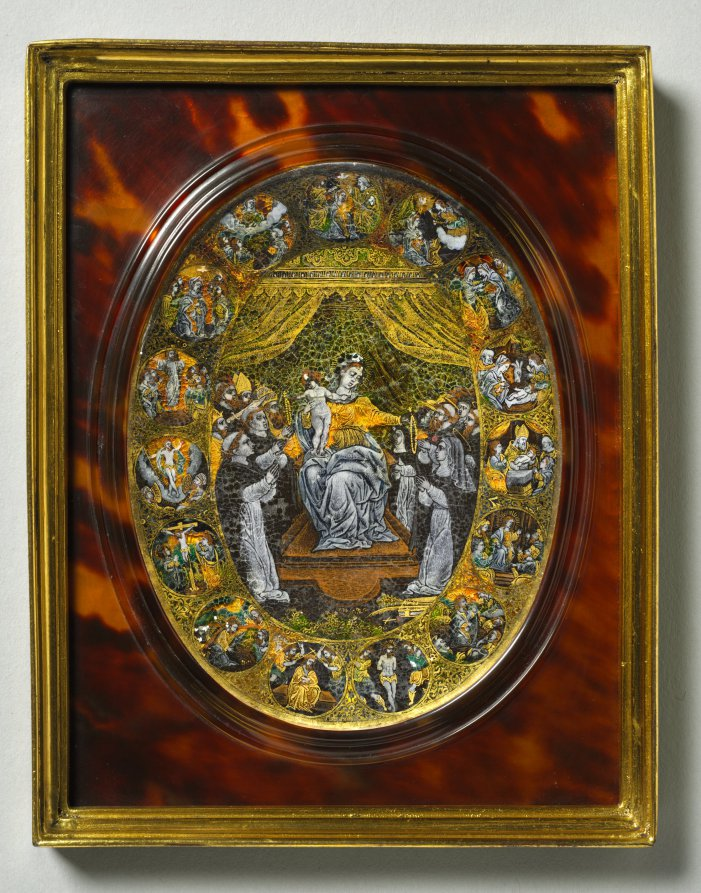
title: Plaque Depicting the Madonna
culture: Italy, 16th century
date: mid 1500s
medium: enamel on copper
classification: Glass